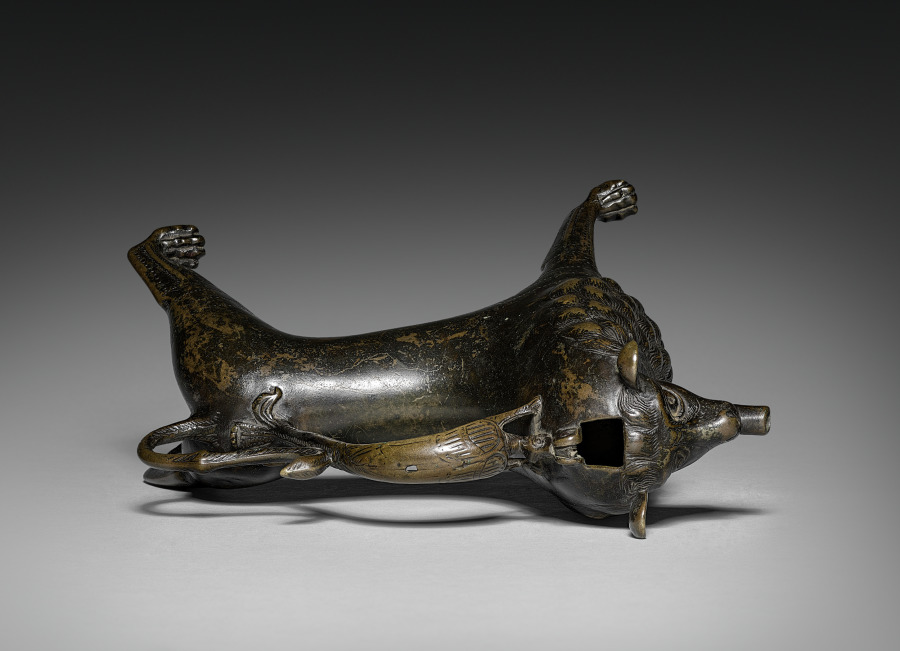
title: Lion Aquamanile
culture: Germany, Lower Saxony, Hildesheim, Gothic period, first half 13th century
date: 1200–1250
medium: bronze: cast, chased, and punched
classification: Sculpture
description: An aquamanile is a water vessel used for washing hands both at church altars and at the dinner tables of upper-class patrons. They often took the form of fantastic beasts such as dragons and unicorns or animals such as horses, birds, dogs, and lions, like this one.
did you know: The handle of this vessel is in the shape of a dragon with a long curving tail.